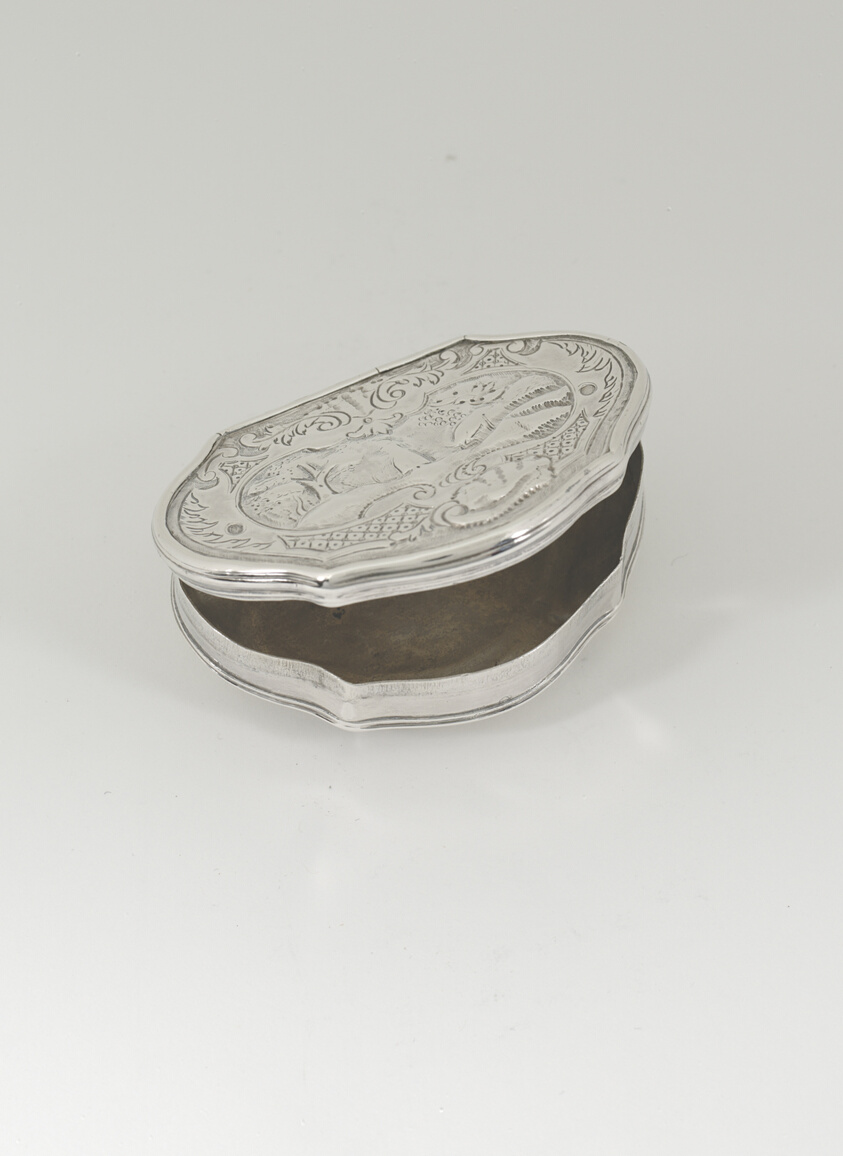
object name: Metalwork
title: Snuff Box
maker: Thomas Dane; American, 1726–1759; Boston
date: 1752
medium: Silver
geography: Boston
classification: container; snuff box; box; silver; american decorative arts; american arts; decorative arts